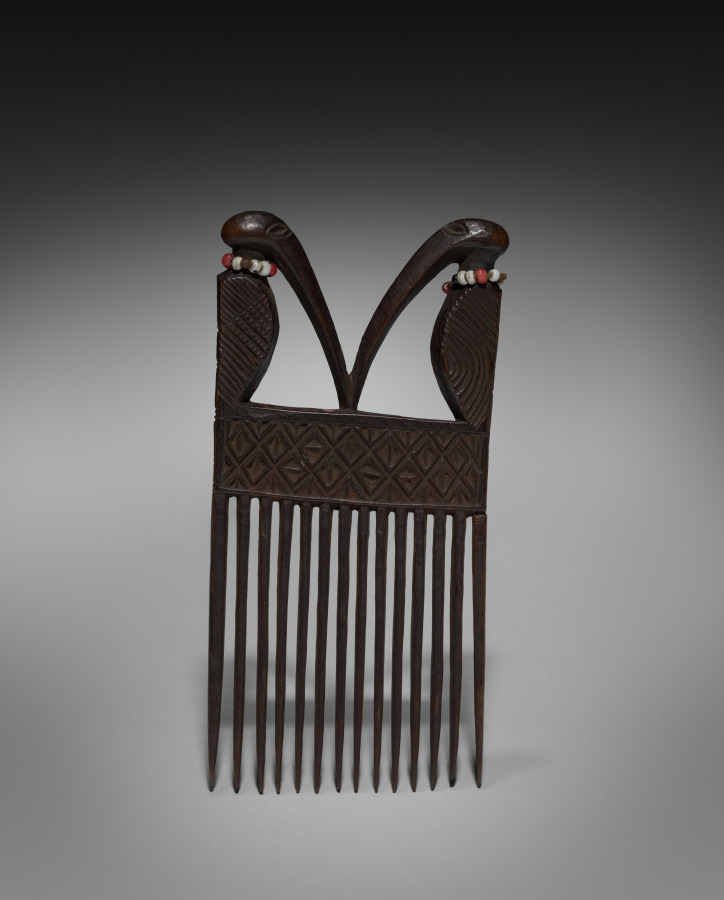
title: Comb (cisakulo)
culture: Africa, Central Africa, Angola, or Democratic Republic of Congo, Chokwe-style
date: mid- to late 1800s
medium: Wood, glass beads, and natural fibers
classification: Jewelry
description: Chokwe women and men inserted finely decorated combs and pins in their hair to signal rank and wealth. Here, as among neighboring peoples, hairstyles reflected changing trends across place and over time. This comb's wooden material and sculptural top made it of a higher value than simple examples made from metal or cane. Its wide teeth were practical, securing elements of a hairstyle in place. The long-beaked ngungu birds with beaded necklaces were a well-known symbol of chiefly power. In addition to being a sign of beauty and good health, a well-styled hairdo also suggests that the wearer relies on the help of others in its creation. Combs were often gifted to women by admirers or husbands to mark important life events. This comb entered the Cleveland Museum of Art's collection in 1915, one year before the museum opened its doors.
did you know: The double birds on this comb are the ngungu, a kind of hornbill linked to hunting and the related power of leaders. They were considered a good omen, and served as mediators between the earthly world and the spiritual one.